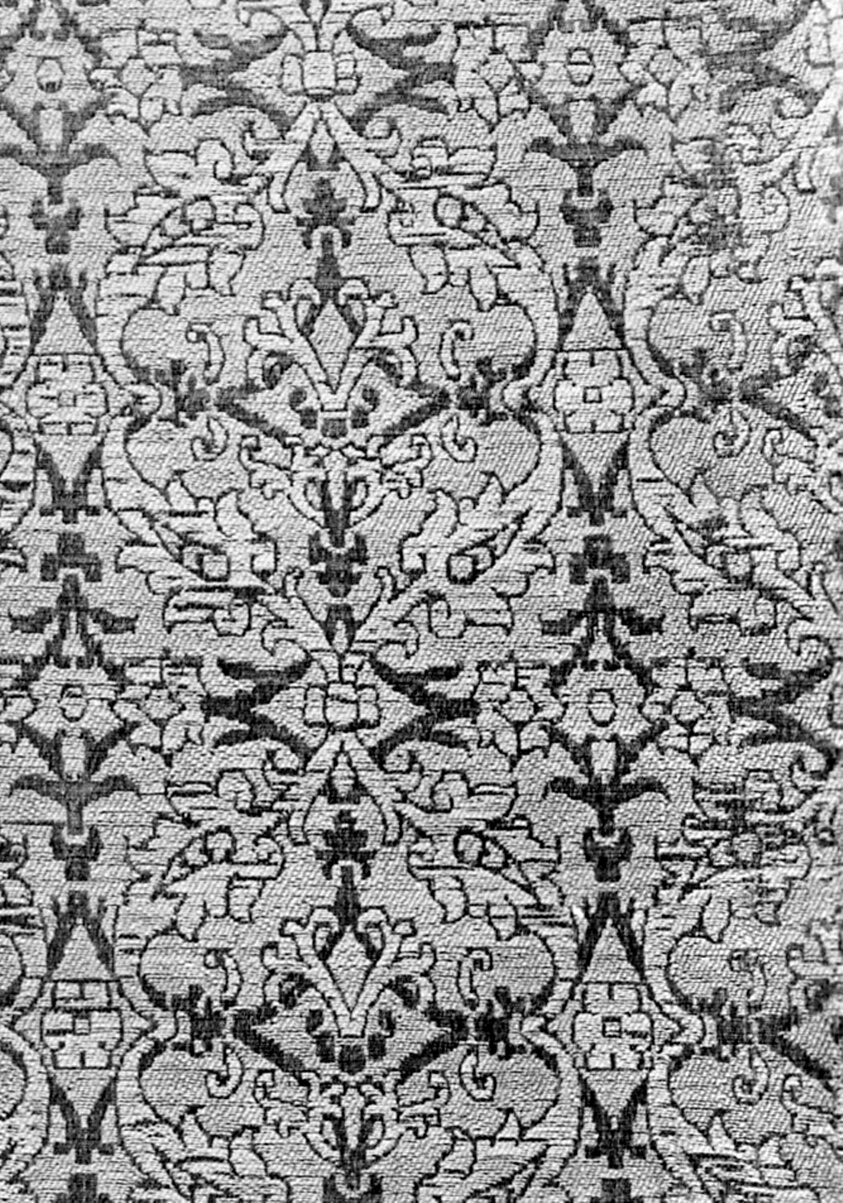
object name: Textile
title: Fragment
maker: Spain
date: End of 16th century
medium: silk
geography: Spain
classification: textile; weaving